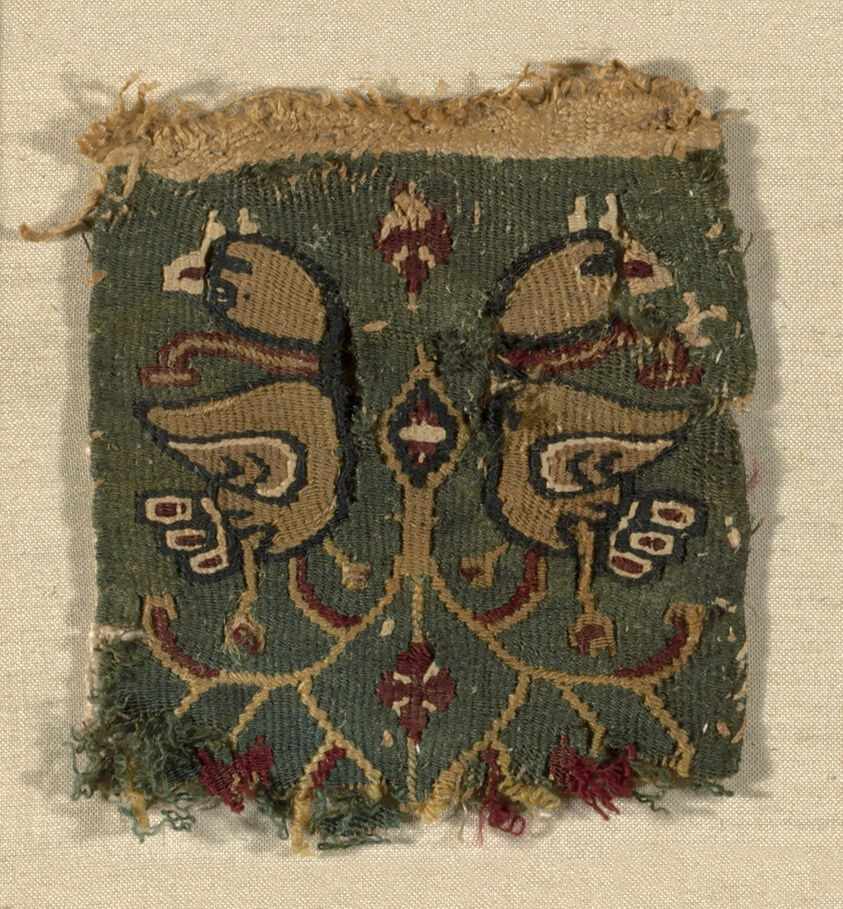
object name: Textile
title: Fragment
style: roman period (egyptian), arabian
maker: Coptic (Egypt)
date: Roman period (30 B.C.– 641 A.D.)/Arab period (641–969), 7th/8th century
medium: Linen and wool, slit tapestry weave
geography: Egypt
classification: textile; weaving